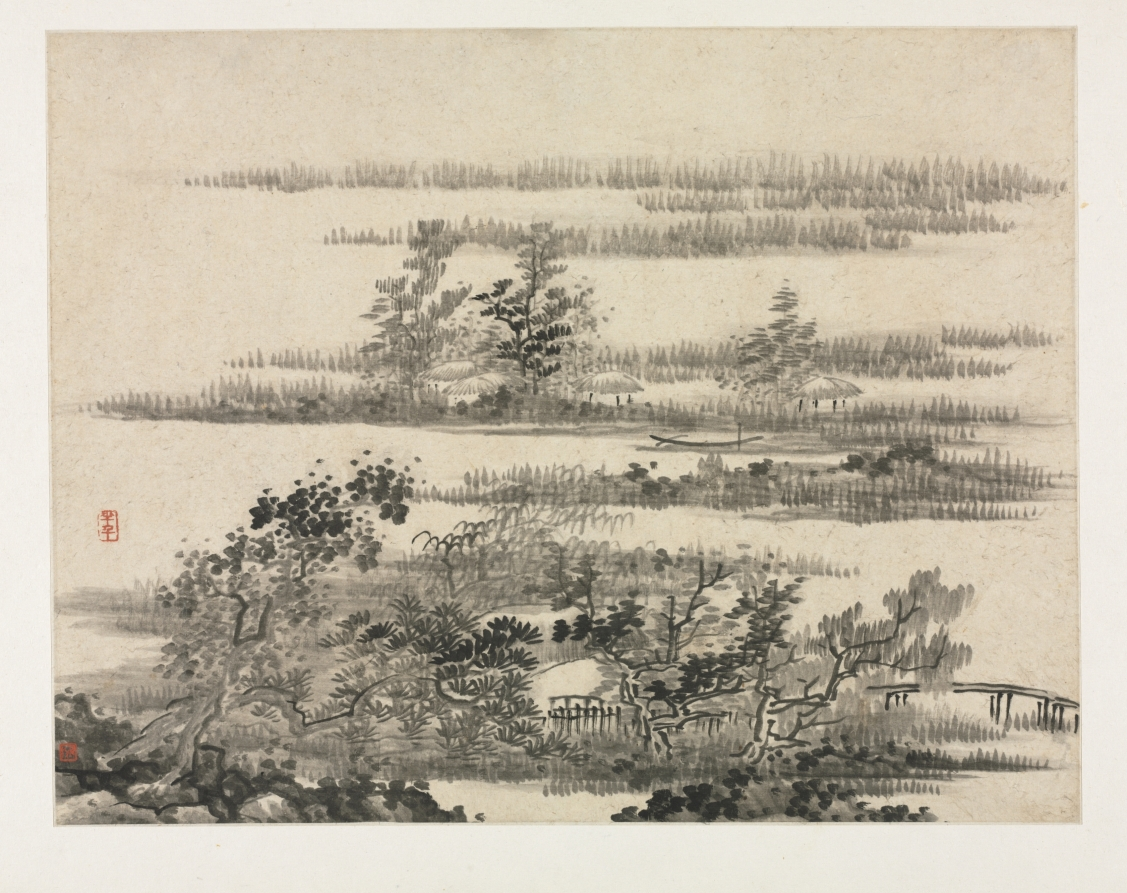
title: Summer in the Water Country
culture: China, Qing dynasty (1644-1911)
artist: Gong Xian (Chinese, 1599–1689)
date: 1670s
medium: Album leaf; ink on paper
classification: Painting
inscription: Artist's seal: Ban qian 半千. 1 additional seal unidentified.